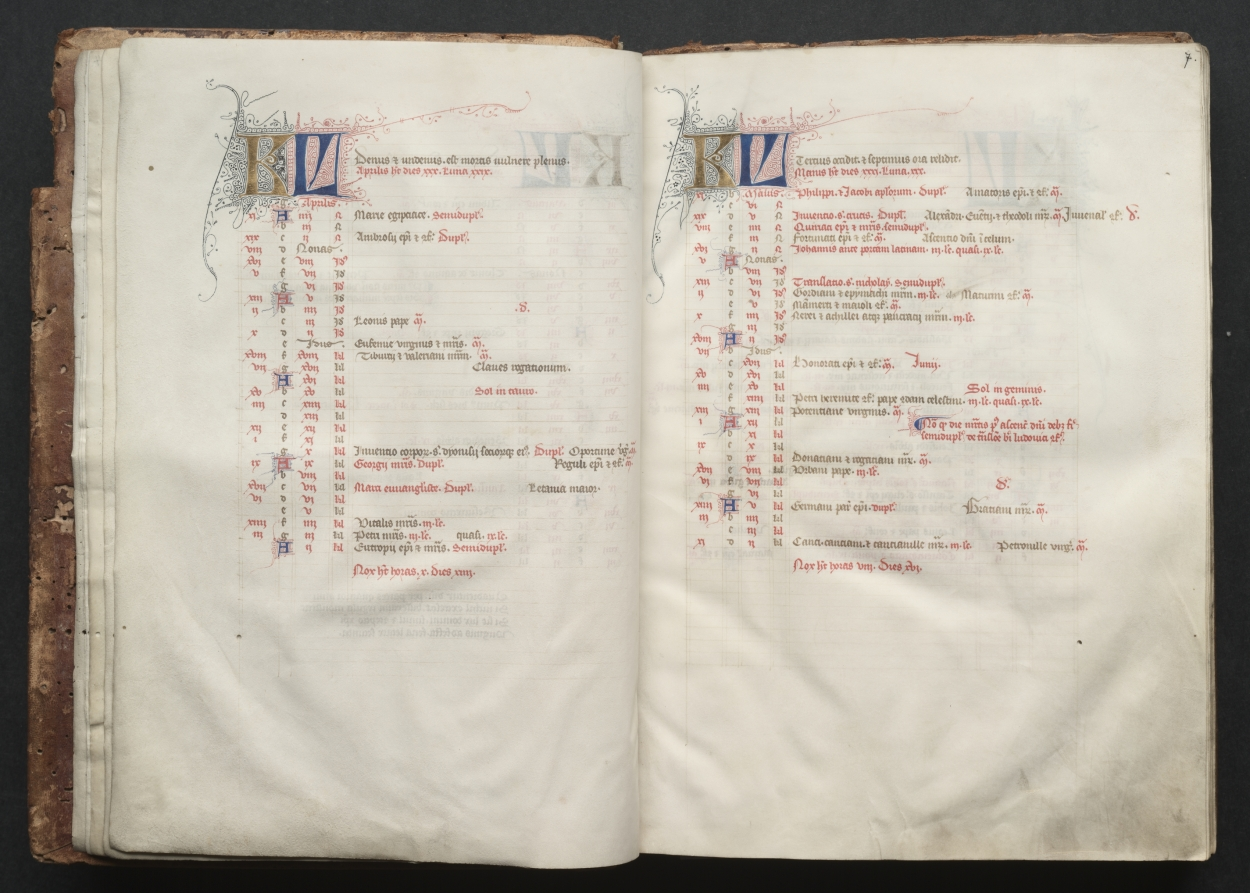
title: The Gotha Missal: Fol. 7r, Text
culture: France, Paris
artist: Master of the Boqueteaux (French)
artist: and Workshop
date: c. 1375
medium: ink, tempera, and gold on vellum; blind-tooled leather binding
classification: Bound Volume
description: The style and quality of this manuscript's decoration is typical of deluxe Parisian books made for aristocratic or royal patrons. Most of the book's decoration appears to be the work of the Master of the Boqueteaux, an artist active at the court of King Charles V (died 1380). His style was apparently shared by a number of book illuminators working in and around Paris. It is very possible that the Gotha Missal belonged to Charles V, but is not provable because the manuscript has no royal portraits and lacks a colophon. Given the book's magnificent decoration, however, it would seem that it was produced for a Valois prince, if not for the king himself. The manuscript receives its name from the German dukes of Gotha, its later owners.